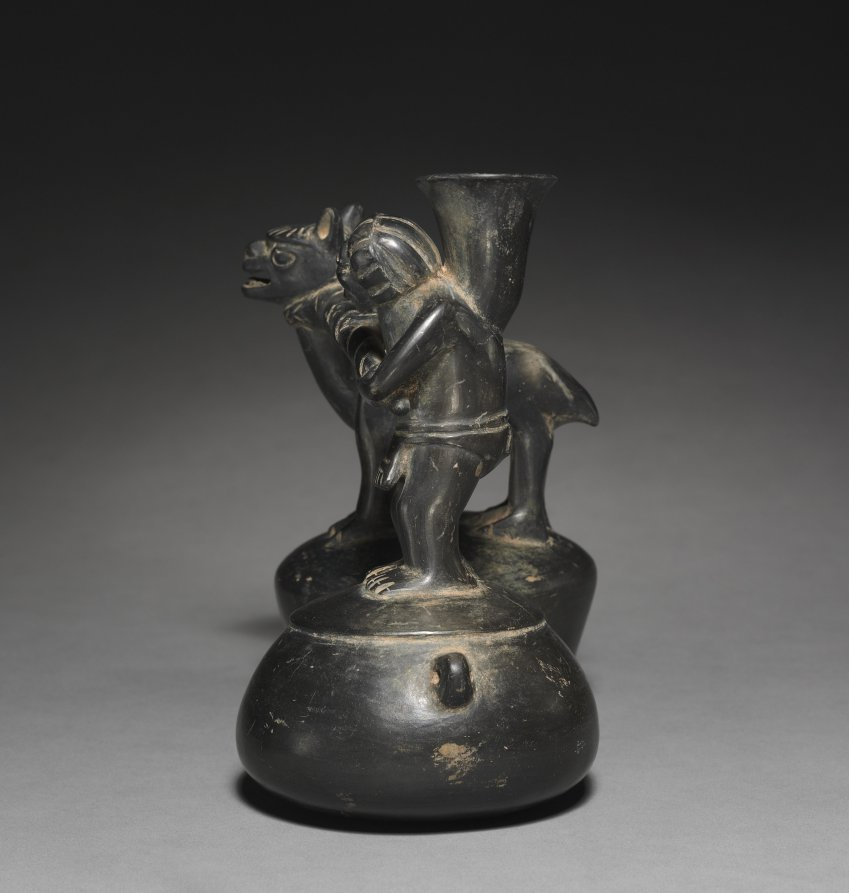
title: Double-chambered Vessel with Figures and Camelid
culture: Andes, Chimú-Inka, late 15th - mid 16th century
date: 1470–1532 (Thermoluminescence date, 1310–1610)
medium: ceramic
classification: Ceramic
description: Under the Chimú, ceramic seems to have been a less important artistic medium than for earlier north coast cultures. Accordingly, ceramics were mass-produced with molds and, rather than bearing painted scenes, often have an overall dark surface achieved by firing in a smoky atmosphere. The double-chambered vessel was made after the Inka conquered the Chimú in the 1460s.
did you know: When this vessel is filled with liquid and tilted back and forth, the camelid emits a whistling sound.